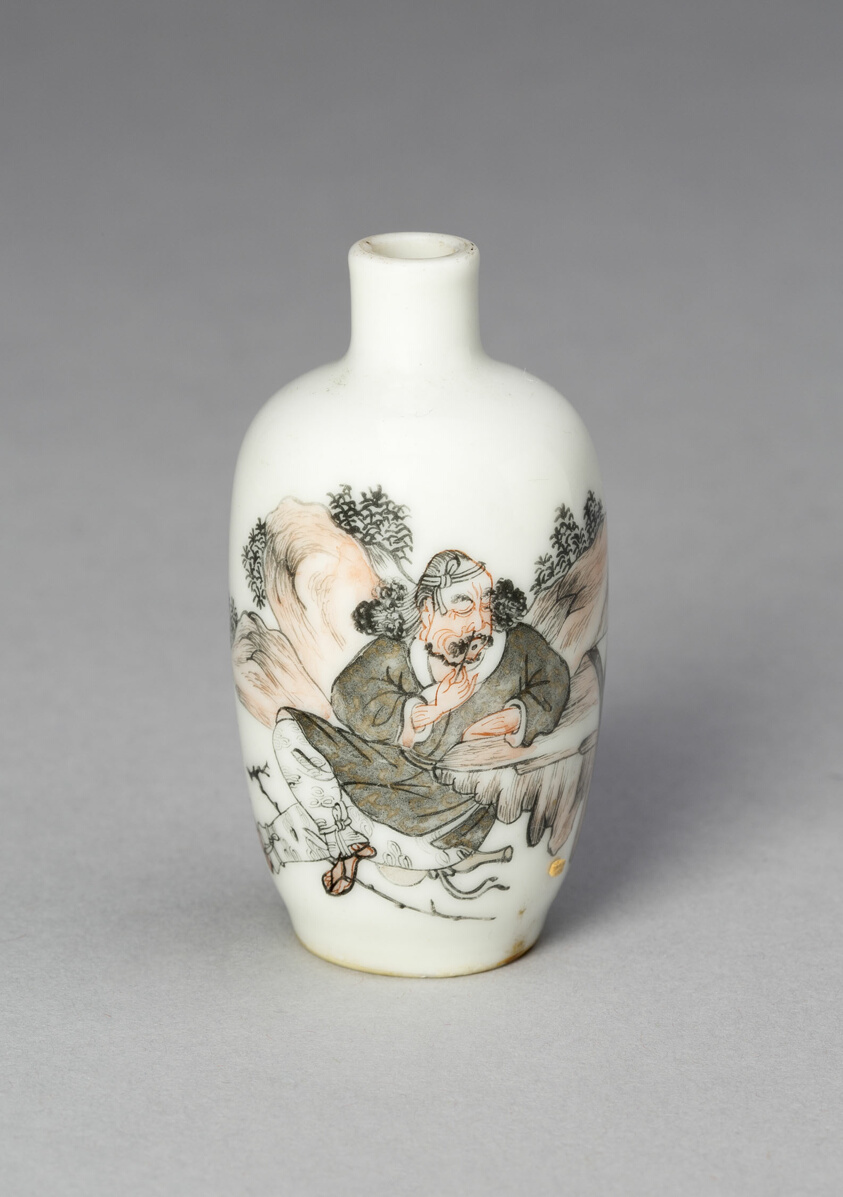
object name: Vessel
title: Snuff Bottle with Li Tieguai Leaning against a Rock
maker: China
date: Qing dynasty (1644–1911), 1820–1880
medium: Porcelain painted in overglaze enamels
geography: China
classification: snuff bottle; porcelain; ceramics; asian art; vessel